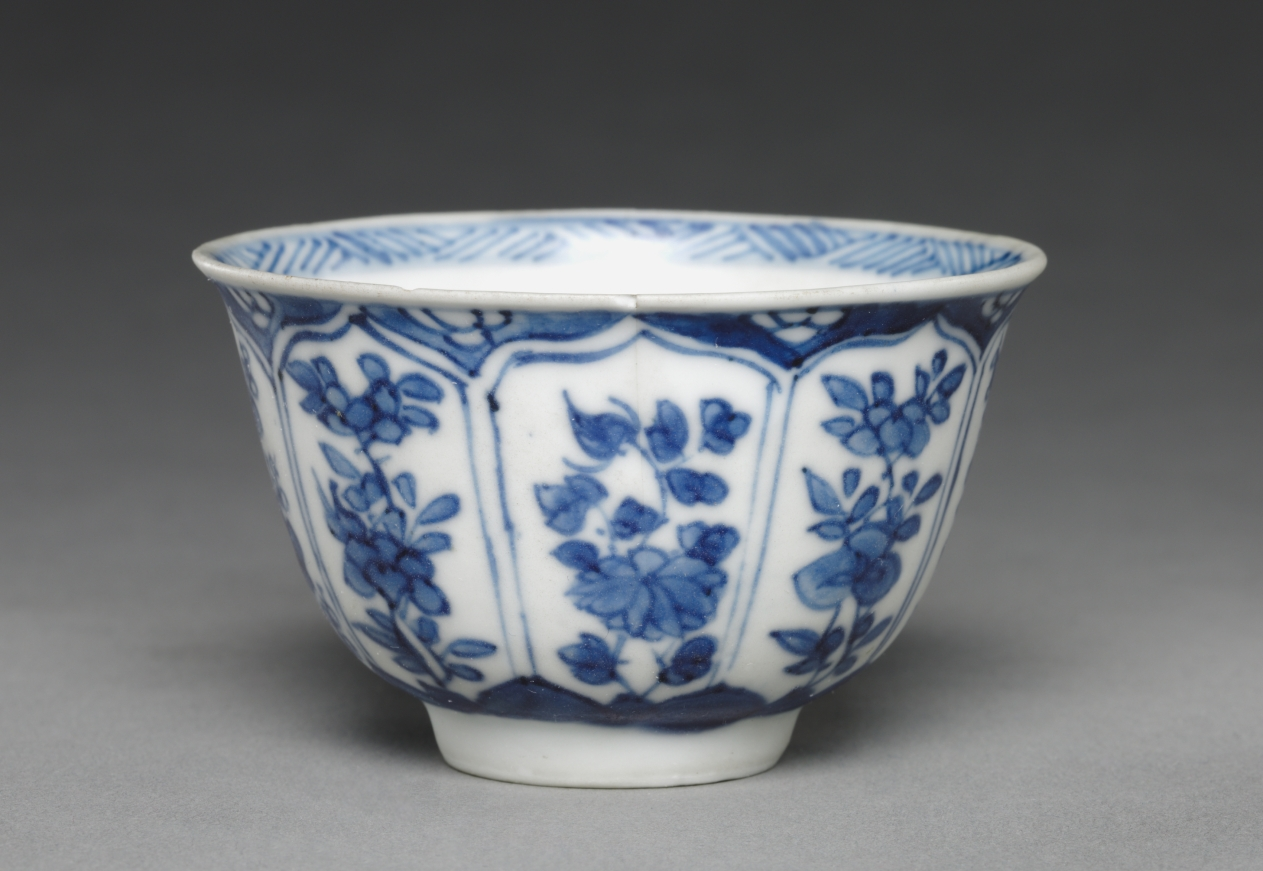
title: Tea Cup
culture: China, Qing dynasty (1644-1911)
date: c. 1690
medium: porcelain with blue and white decoration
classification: Ceramic